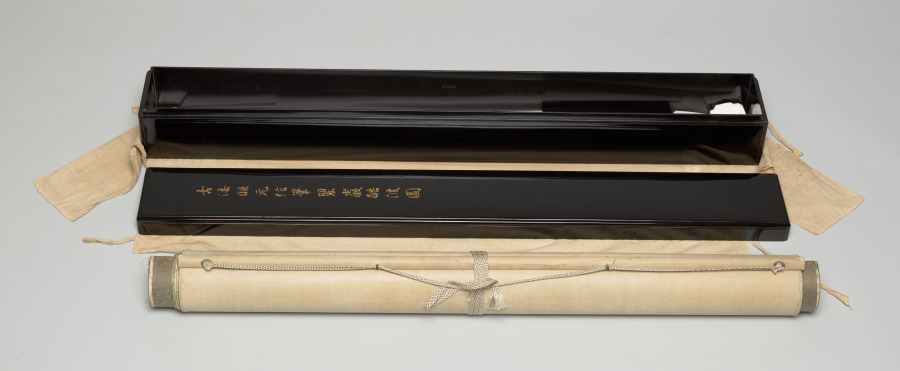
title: Rocks and Waves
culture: Japan, Muromachi period (1392–1573)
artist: attributed to Kano Motonobu (Japanese, c. 1476–1559)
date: early to mid-1500s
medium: sliding door fragment mounted as a hanging scroll; ink and gold wash on paper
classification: Painting